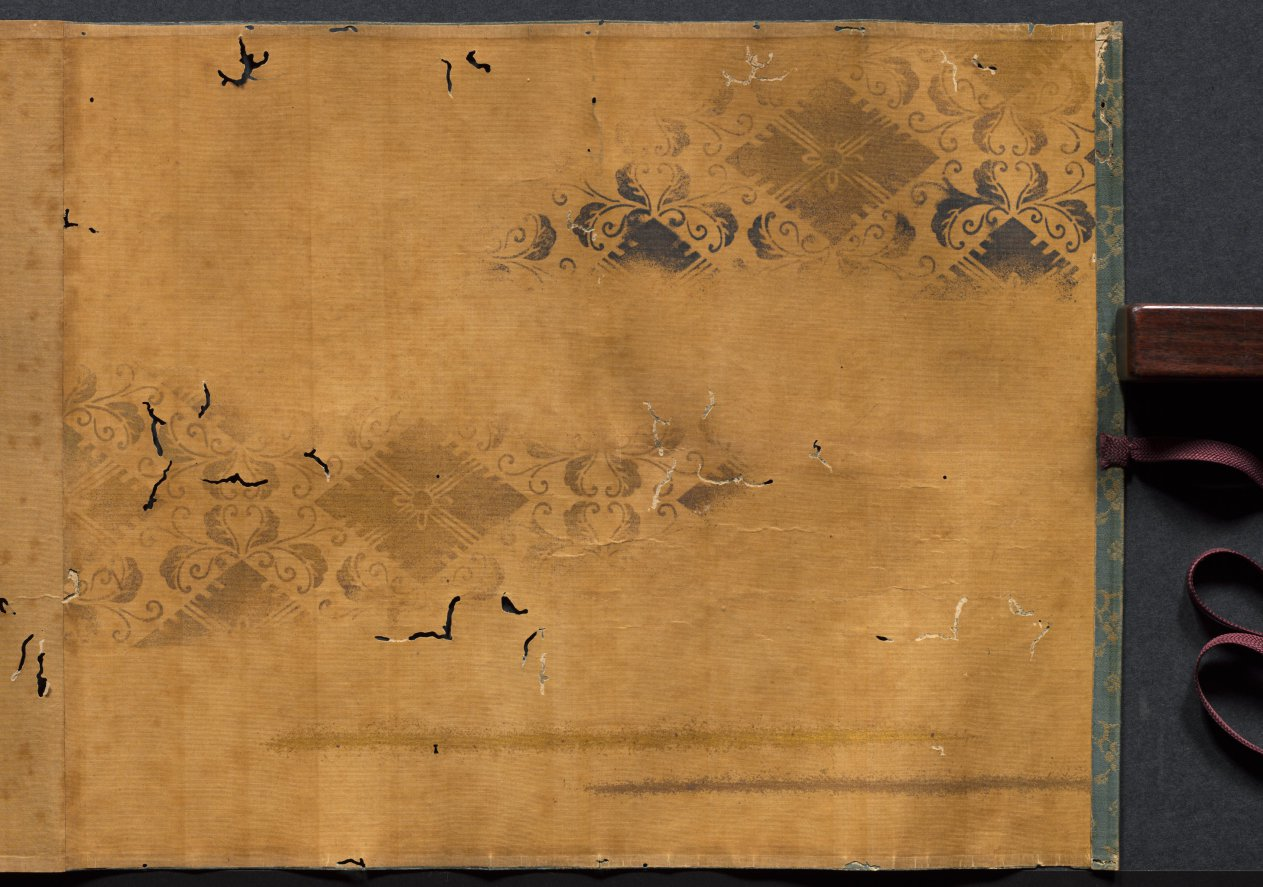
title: Eight Views of Xiao-Xiang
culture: Japan, Edo period (1615–1868)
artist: Kano Tan’yū (Japanese, 1602–1674)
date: 1615–1868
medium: handscroll; ink on silk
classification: Painting